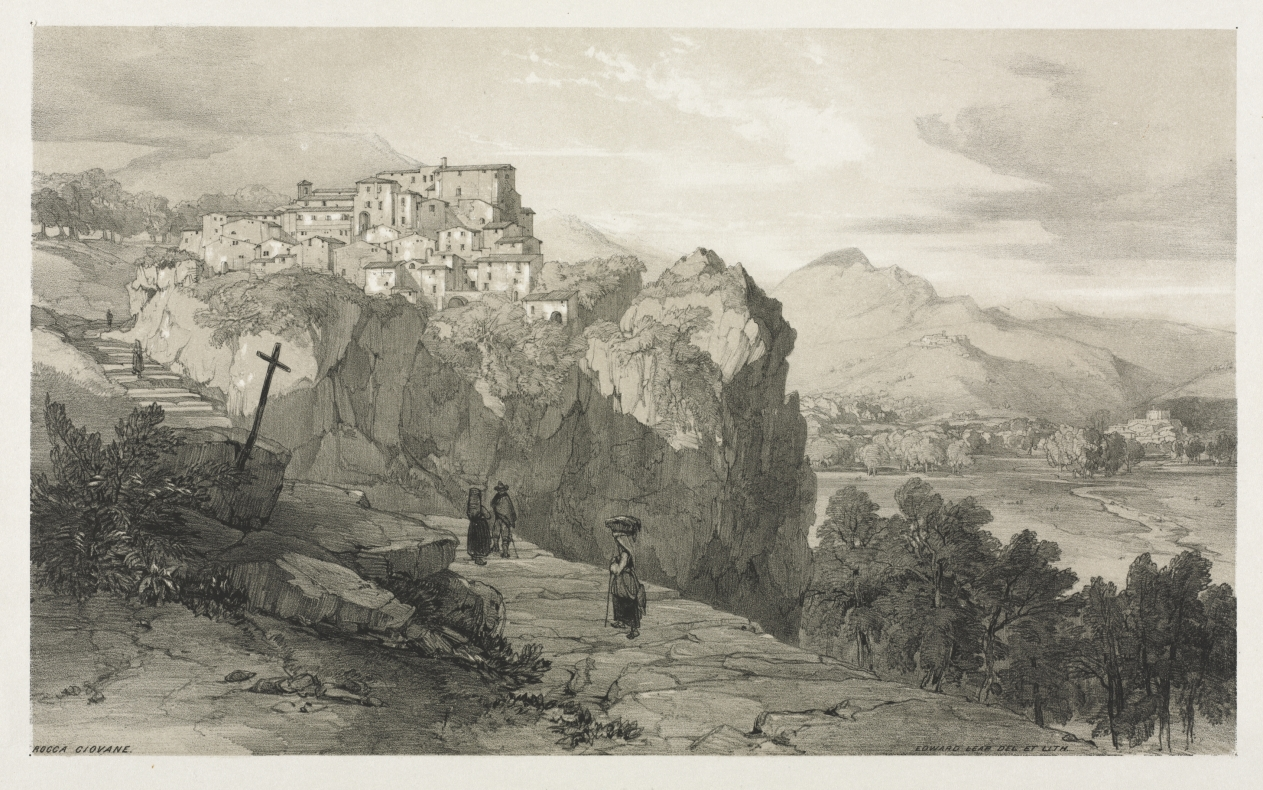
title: Rocca Giovane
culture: England, 18th century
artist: Edward Lear (British, 1812–1888)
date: 1841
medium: lithograph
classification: Print